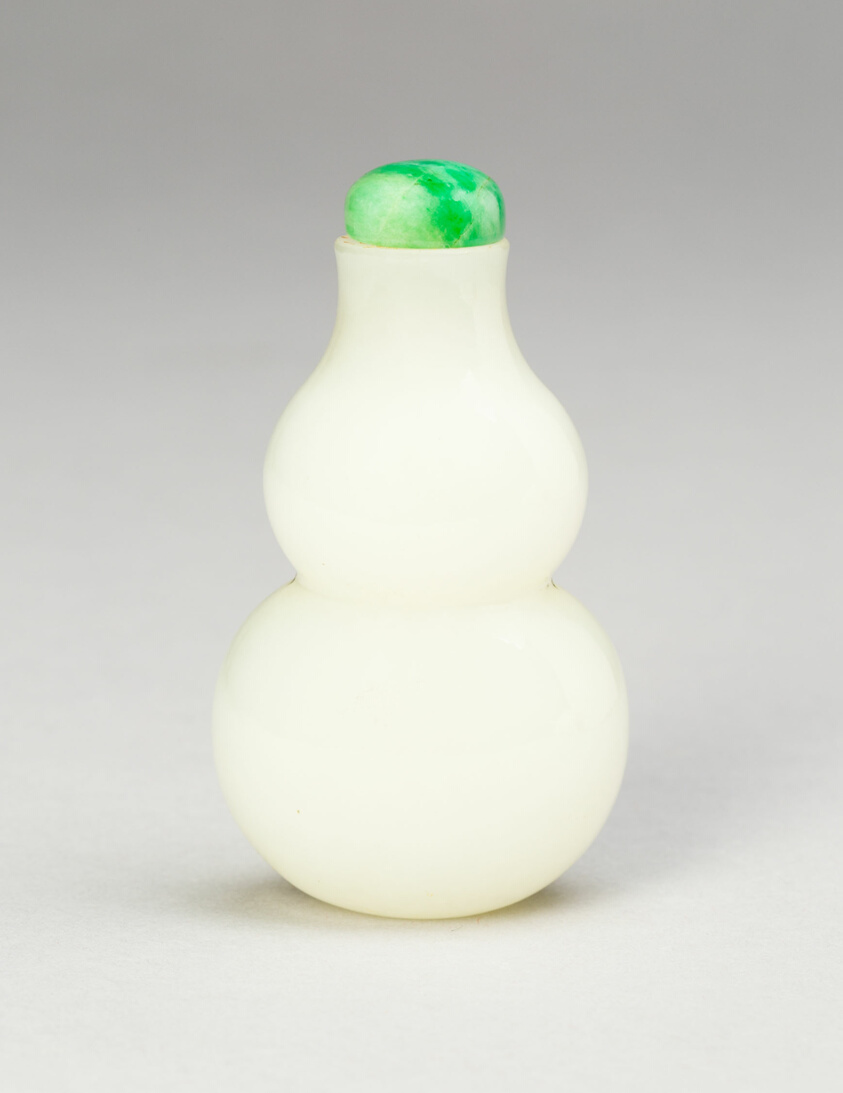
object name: Vessel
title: Gourd-Shaped Snuff Bottle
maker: China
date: Qing dynasty (1644–1911), 1740–1800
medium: White jade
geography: China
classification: snuff bottle; asian art; vessel